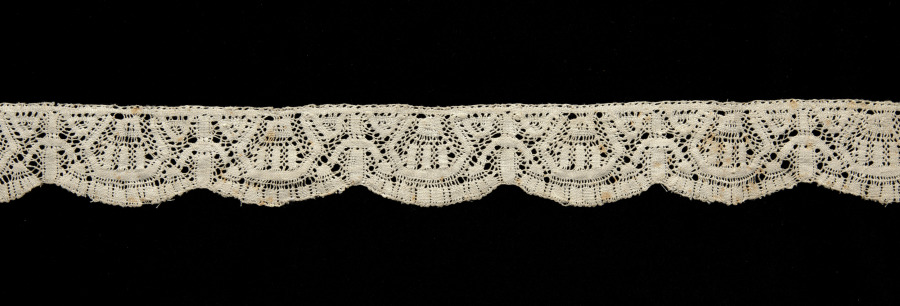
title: Lace Edging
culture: Italy, Abruzzi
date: 1600s–1700s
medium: Bobbin lace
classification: Lace